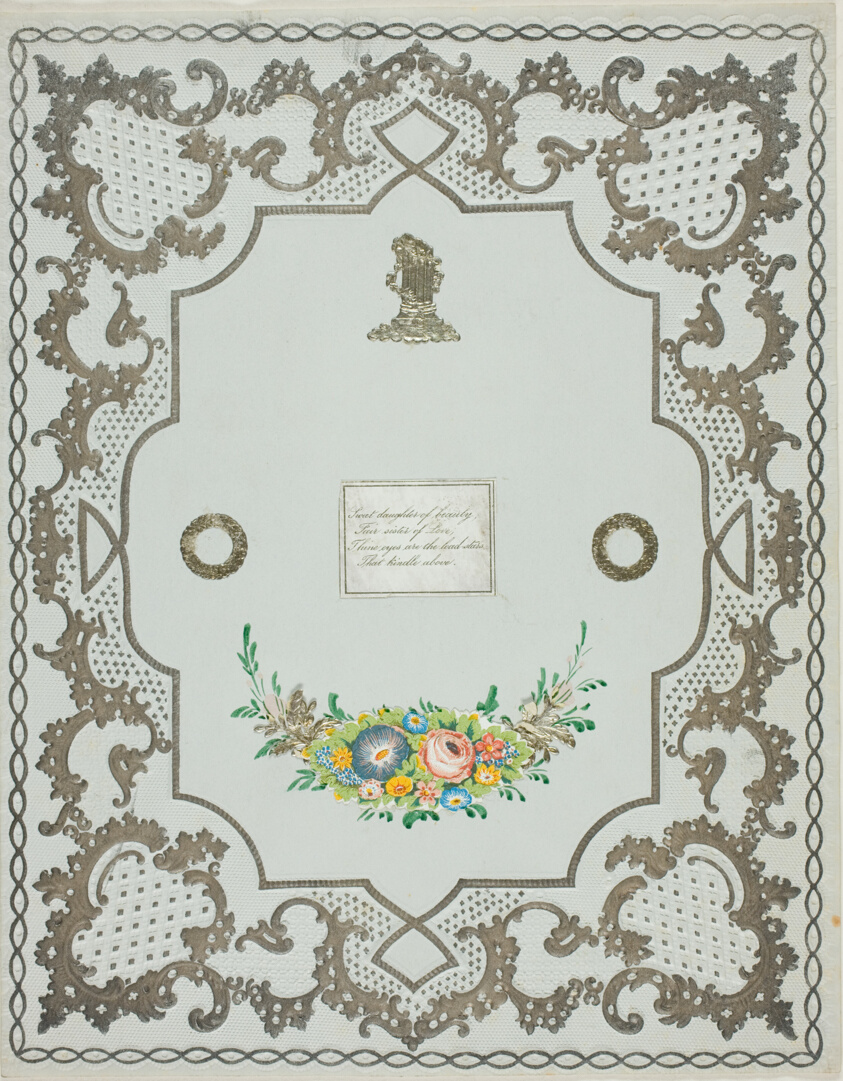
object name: Drawing and Watercolor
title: Sweet Daughter of Beauty (valentine)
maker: Unknown Artist; American, 19th century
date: c. 1850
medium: Collaged elements on gray accented and embossed light blue wove paper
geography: United States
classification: valentine; prints and drawing; paper